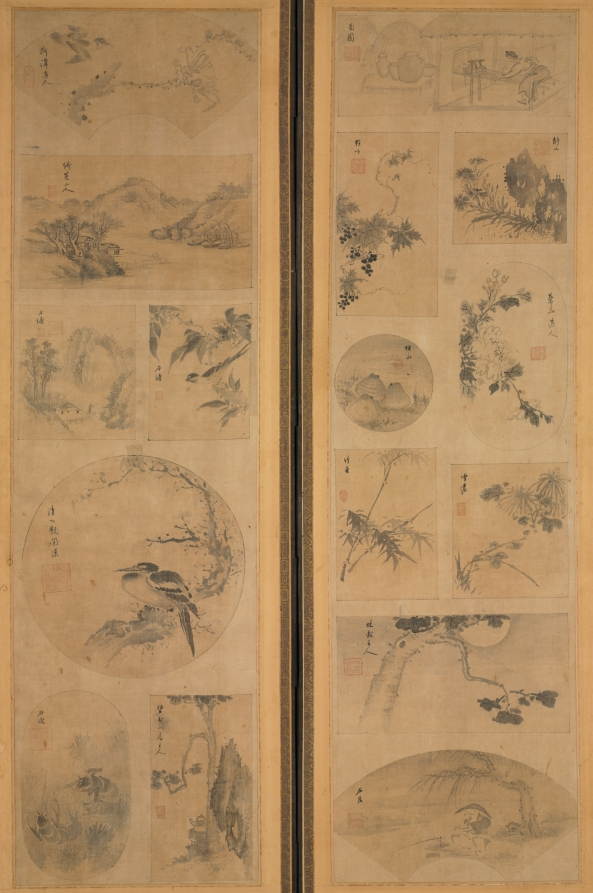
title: Painting of One Hundred Themes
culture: Korea, Joseon dynasty (1392–1910)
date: late 1800s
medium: Ten-panel folding screen affixed with album leaves (obverse), calligraphy (reverse), ink and color on silk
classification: Painting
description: The front of this screen features an assortment of subjects: birds and flowers, landscapes, and scenes of everyday life, mostly in monochromatic ink with light colors. The screen’s reverse side conveys a number of classical poems about the fleeting beauty of the four seasons. Traditionally, only one side of a folding screen bears painted or embroidered images, since these were used as a background furnishing. In Korean houses by the 1800s and early 1900s, however, two-sided folding screens became noticeably popular, possibly inspired by Japanese double-sided folding screens, which mainly served as room dividers in Japanese households.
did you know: The way of displaying small images of various subjects became one of the most popular type of painting toward the end of the 19th century.